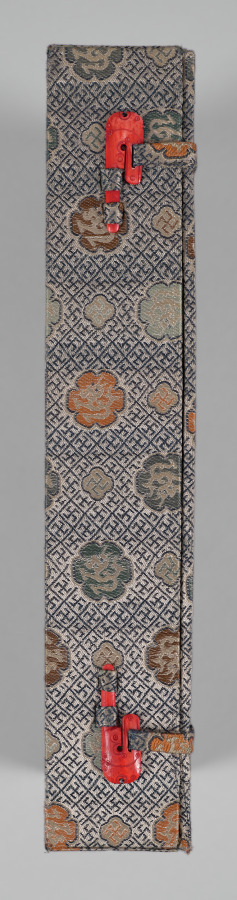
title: Yu-hai (Ocean of Jade) woodblock bound volume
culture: China, Ming dynasty (1368–1644)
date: 1368–1644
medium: woodblock-printed book with painted edges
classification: Bound Volume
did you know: When each book is rolled to form a cylinder, a landscape appears on the edges, painted in ink and washes of color.